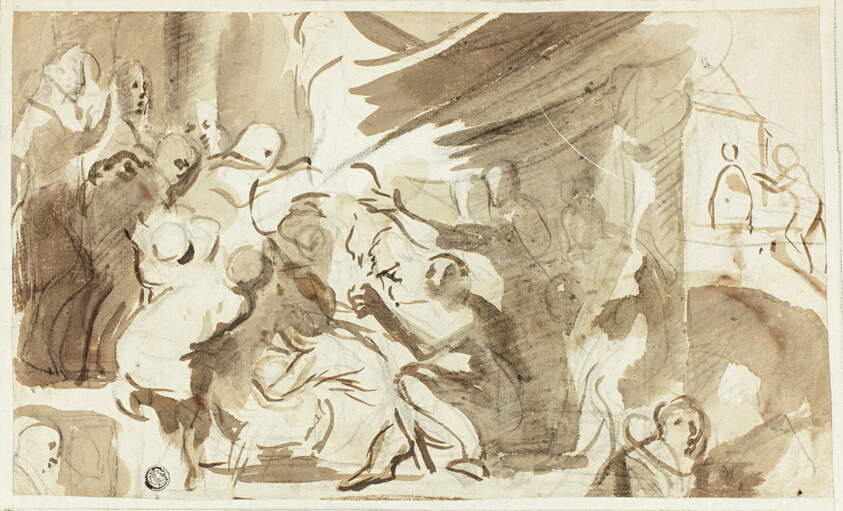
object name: Drawing and Watercolor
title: Study for the Sine Baccho et Cerere Friget Venus (recto); Family of Darius before Alexander (verso)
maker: Attributed to Jacob Jordaens; Flemish, 1593-1678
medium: Pen and black ink with brush and brown wash, over black chalk (recto), and brush and brown wash over black chalk (verso), on ivory laid paper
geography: Flanders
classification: pen and ink drawings; drawings (visual works); prints and drawing